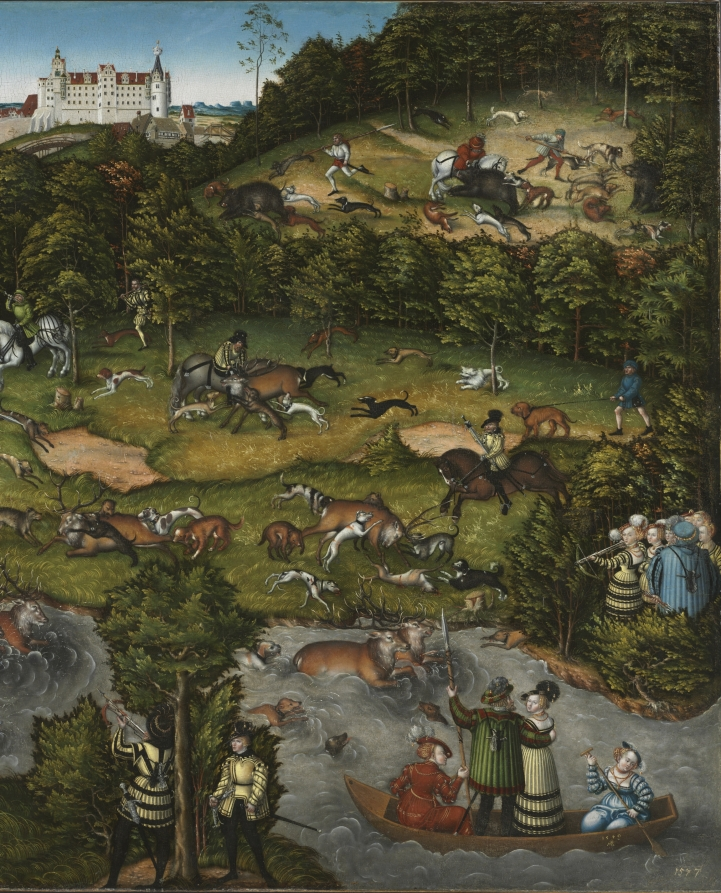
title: Hunting near Hartenfels Castle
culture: Germany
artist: Lucas Cranach (German, 1472–1553)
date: 1540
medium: oil, originally on wood, transferred to masonite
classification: Painting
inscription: Signed lower right on boat with a winged serpent, and dated: 1540 [inventory number, lower right: 1577]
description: The Protestant rulers of Saxony commissioned this animated hunt scene, set near their residence seen in the background, Hartenfels Castle (in eastern Germany). John Frederick the Magnanimous, in the bottom left corner, wears dark green hunting attire; he spans his crossbow and waits for his courtiers and dogs to chase a stag across the river. His wife, the Electress Sibylle, stands at right, poised to take the first ceremonial shot. The prince electors of Saxony were passionate practitioners of hunting with dogs—elaborate, highly rehearsed occasions, coordinated by the use of signals from hunting horns. Cranach dated this work and his signature is the winged snake at lower right. 1577 in the right corner is an inventory number.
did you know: Humans, dogs, and deer make up most of the creatures in this busy scene—but not all of them! Look closely at the background to spot a bear and three boars.